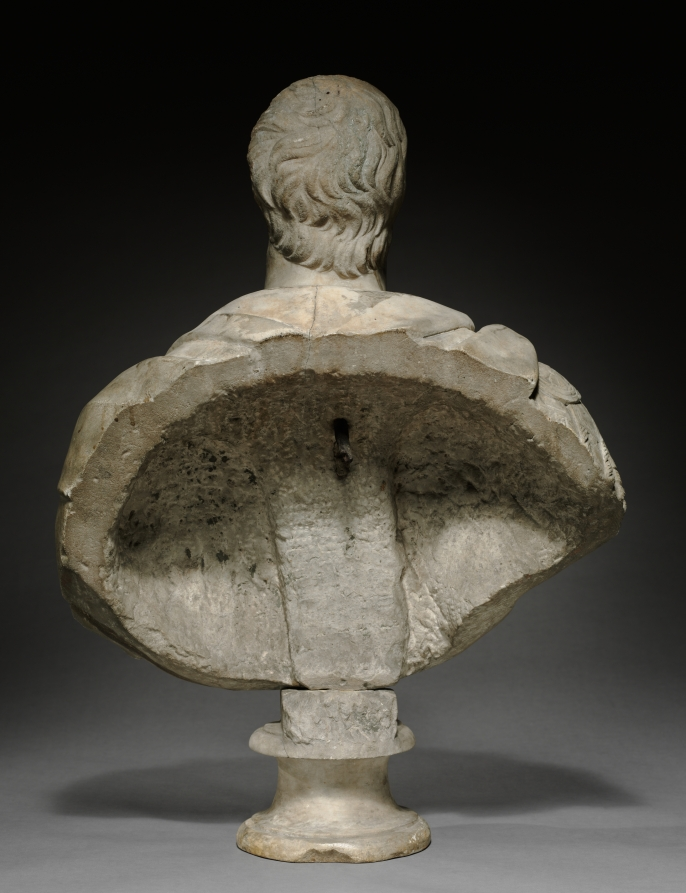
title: Bust of a Man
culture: Italy, Face: Roman, early 2nd century or later; Body: 16th century or later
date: Face: early 2nd century or later. Body: 1500s or later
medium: marble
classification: Sculpture